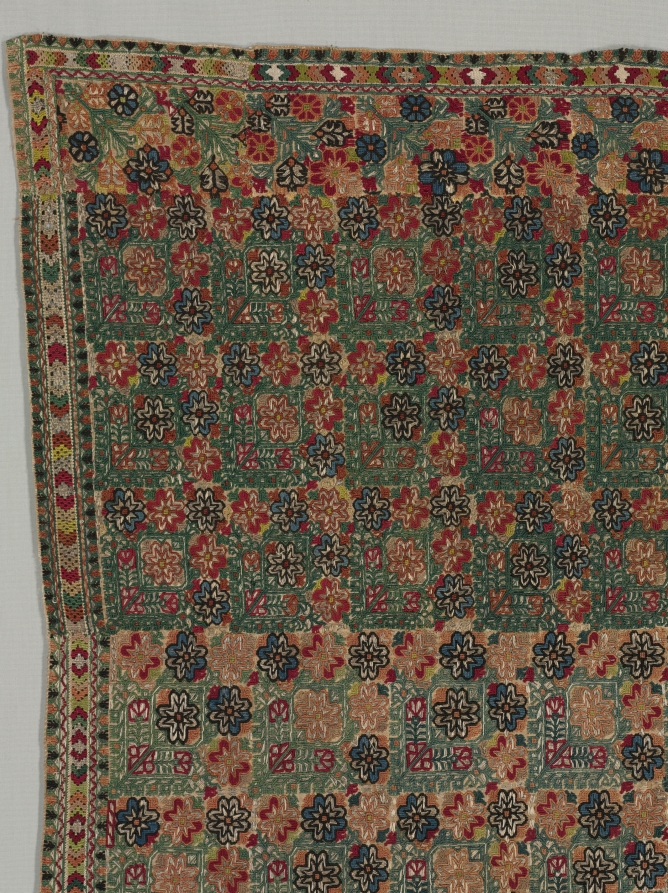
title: Embroidery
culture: Turkey ?, 19th century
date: 19th century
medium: embroidery: silk and metal strips on linen tabby ground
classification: Embroidery